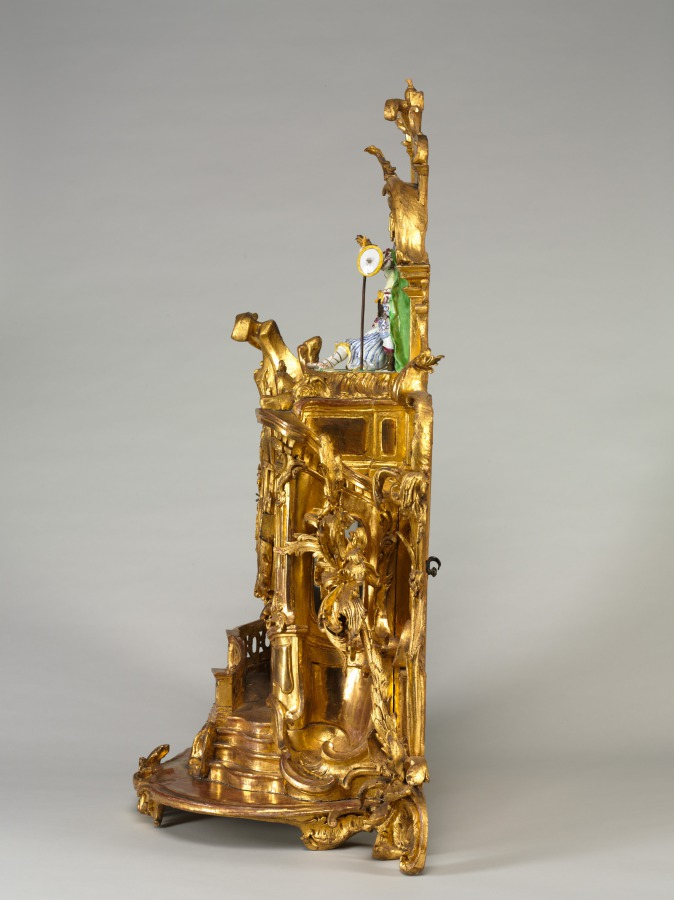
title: Clock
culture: Germany, 18th century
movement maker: Baumgartinger (German)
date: c. 1750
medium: carved and gilded wood, faience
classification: Furniture and woodwork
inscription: inscribed on face: Baumgartnger [sic] Mergentheim.